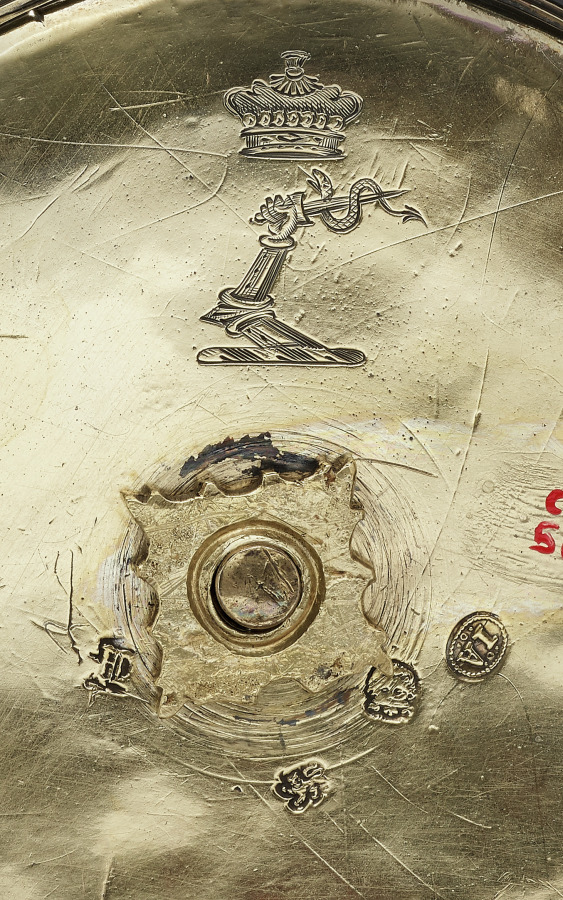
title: Two-Handled Cup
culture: England, London, 17th century (Charles II)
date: 1677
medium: silver and silver gilt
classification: Silver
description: Due to its size and ornament, this vessel may have functioned as a caudle-cup, containing a mixture of ale or wine and bread, oatmeal, eggs, sugar, and spices that was given to women after childbirth to help them regain their strength. The scrolling foliage and exotic birds along the exterior of this cup were likely based on prints circulating in the 1600s. The reclining female figures capping the handles and the acanthus bud finial on the accompanying lid recall common architectural motifs.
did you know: This two-handled cup is accompanied by a lid. See cover record.